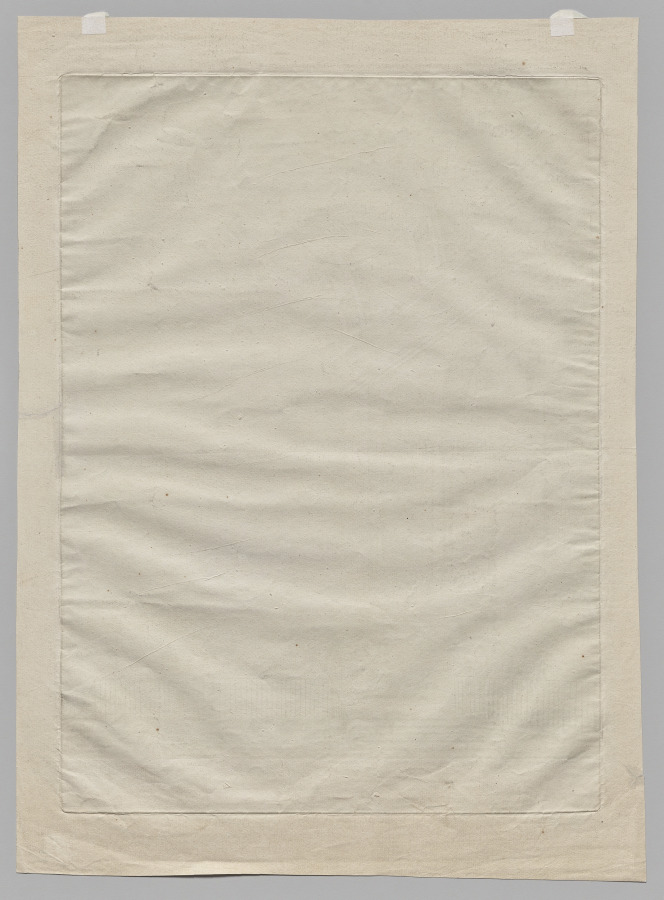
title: A View of the Inside of a Church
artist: Georges Francois Blondel (French, 1730–1800)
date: 1766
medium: mezzotint printed in black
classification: Print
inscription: Imprinted on recto: “A View of the Inside of a Church”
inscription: Imprinted on recto: “Composed and Engraved by G.F. Blondel.”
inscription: Imprinted on recto: “To Thomas Pitt Esq. This Plate is most Humbly Dedicated by his most Humble Serv’t/Published according to Act of Parliament by G.F. Blondel Panton Street./G.F. Blondel/Plate 8”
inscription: Watermark: Grand-Jésus stock of T. Dupuy, watermark Name of Jesus (IHS), countermark T Dupuy Fin Auvergne 1742.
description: After returning from several years spent in Italy, the French printmaker George-Francois Blondel settled in London in order to take advantage of the English taste for images of Italian sites. This is one of a series of eight prints he published in 1766 depicting imagined and real Italian interiors. Using the relatively new technique of mezzotint, which creates velvety, dark tonal areas, as well as low vantage points, Blondel created towering, awe-inspiring spaces. For special patrons, he printed the plates in sepia ink, rather than in black; the CMA’s set includes two of these unusual sepia impressions.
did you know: Mezzotint was relatively new at the time this print was made and had yet to be utilized for such large plates of an architectural nature as seen here.